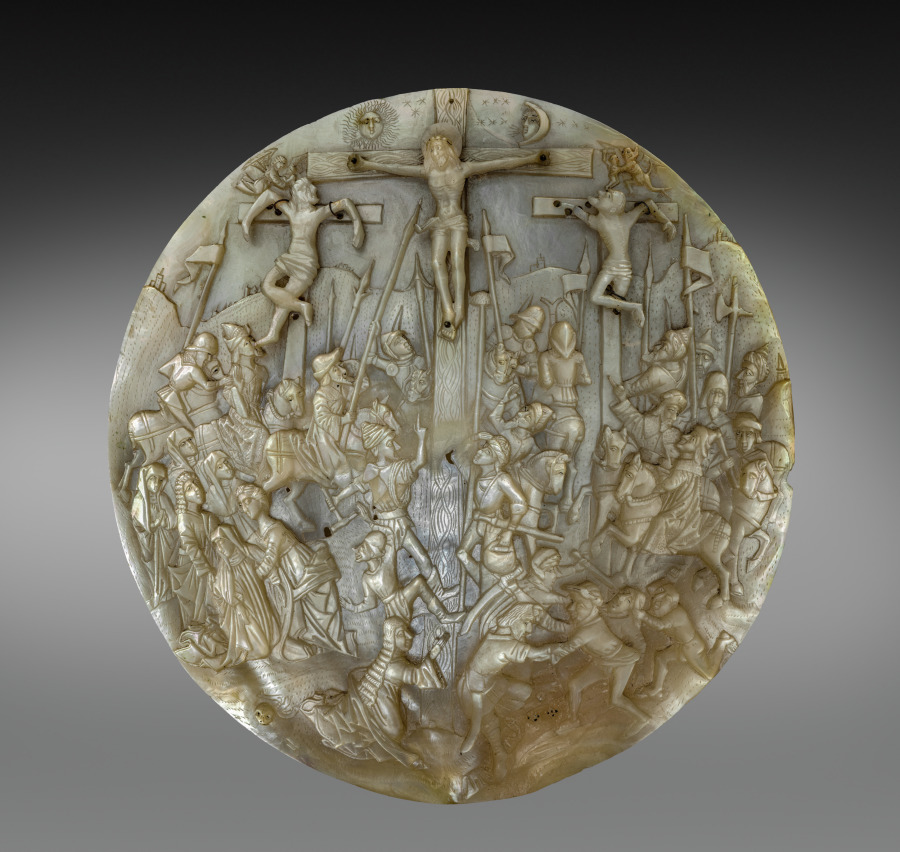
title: Calvary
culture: Germany, Middle Rhine?, 15th century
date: c. 1450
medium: mother-of-pearl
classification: Sculpture